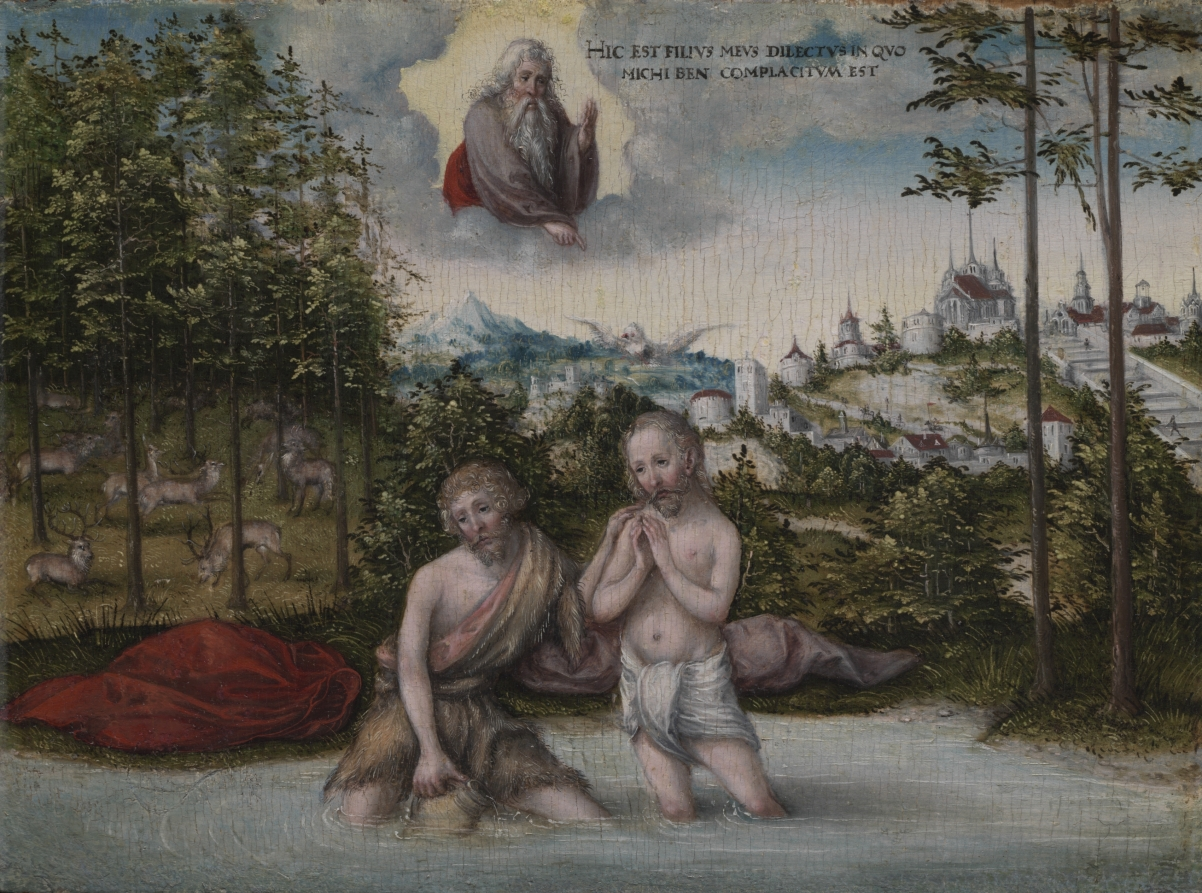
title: The Baptism of Christ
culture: Germany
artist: Lucas Cranach (German, 1472–1553)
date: 1530s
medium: oil on wood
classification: Painting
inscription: Inscribed at top center: HIC EST FILIVS MEVS DILECTVS IN QVO/MICHI BEN COMPLACITVM EST.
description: Painted in minute detail, Cranach’s majestic scene includes elements characteristic of landscapes in 16th-century German art: verdant forest, hilltop city, and distant mountains. A close associate of Protestant reformer Martin Luther, Cranach adapted Christian imagery to reflect Luther’s belief that religious art must narrate scripture. The Gospels describe Christ’s baptism with the heavens opening, a dove descending, and a voice saying, “Here is my beloved son, with whom I am well pleased,” which Cranach painted in Latin directly onto the clouds.